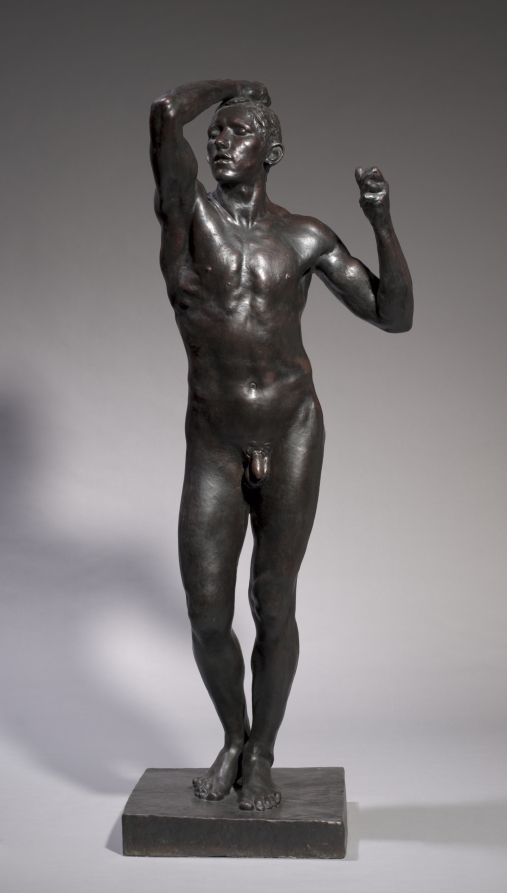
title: The Age of Bronze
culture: France, 19th century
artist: Auguste Rodin (French, 1840–1917)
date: 1875–76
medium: bronze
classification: Sculpture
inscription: inscribed top of base to right: Rodin; inscribed back of base: A. RUDIER Fondeur Paris.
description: Rodin’s earliest surviving life-size sculpture, The Age of Bronze is an enigmatic and provocative image of a man awakening to new consciousness. The figure originally held a spear in one hand; by removing the weapon, Rodin stripped the sculpture of narrative symbols and focused on the sensuality and psychological power of the male nude. Contemporaries found the figure so realistic they falsely accused Rodin of making a cast from a living person. Museum trustee Ralph King commissioned this cast from the artist in 1916 with the intention of donating it to the museum. Rodin personally supervised the exceptionally fine casting and finished it with his favorite patina, a deep reddish tone he called “crushed grape.”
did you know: The sculpture suggests the heroism and suffering of his countrymen during the Franco-Prussian War of 1870–71. This life-sized male figure was modeled after a Belgium soldier named August Neyt.